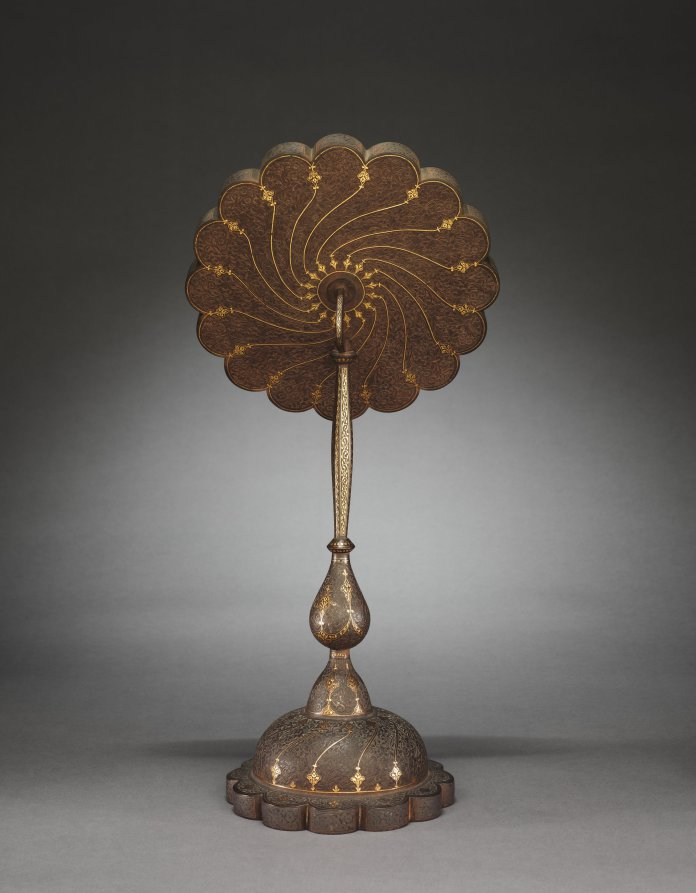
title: Mirror Stand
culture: Iran, Qajar period (1779-1925)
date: 1800s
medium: Steel engraved and inlaid with gold and silver with openwork calligraphic design on hinged door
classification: Metalwork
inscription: Selection from the inscriptions in the surrounding ring: نه هر که چهره برافروخت دلبری داند. نه هر که آینه سازد سکندری داند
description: The mirror was both a courtly accouterment and a popular poetic device in Persian literature. The central circular panel has a hinge and hook that opens to reveal the mirror. The texts in the ring are verses by different authors referring to mirrors. One says: Have they placed a mirror facing the sun at the door of that tent, Or is it the light rays shining from the forehead? Such mirrors were popular during the Qajar period (1779–1925), but this example evokes the grandeur of the earlier Safavid period by inscribing in the center the name of Shah Sulayman (1648–1694) who, fittingly, spent most of his 28-year reign with women in the harem, where such mirrors would have been used.